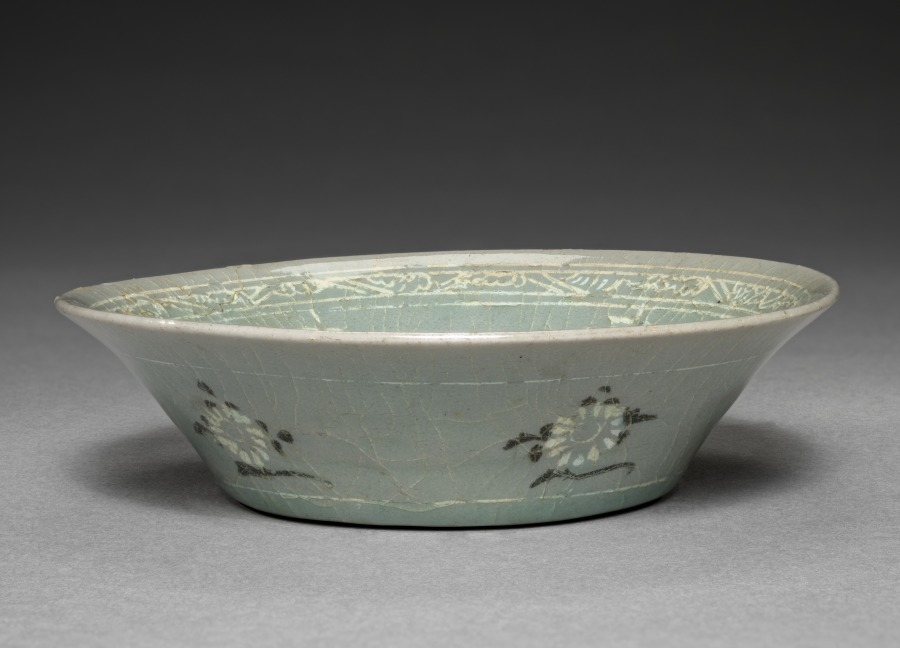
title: Dish with Inlaid Chrysanthemum Design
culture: Korea, Goryeo dynasty (918–1392)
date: 1200s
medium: ceramic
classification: Ceramic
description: Celadon wares used for everyday such as this dish were among the most common burial objects in tombs during the Goryeo period (918–1392). Furnishing tombs with an elaborate assemblage of objects was believed to honor and comfort the newly dead. Generally, Goryeo tombs were left untouched until the late 1800s. During the colonial period (1910–45), however, Japanese archaeologists competitively excavated the tombs located in Kaeseong, the former capital of the Goryeo period, and these wares soon became available for Japanese and Western collectors.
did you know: On the base of this tea bowl, three small spur marks made of bits of clay remain visible, indicating an individual protective casing of fire clay (saggar).